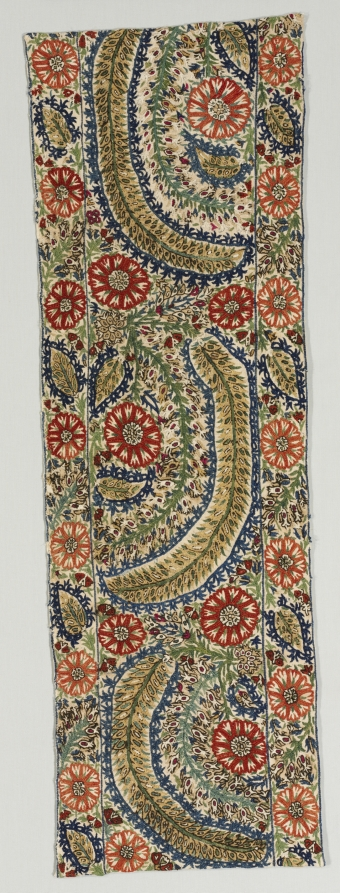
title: Portion of a Bedspread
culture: Greece, Epirus, Yaninna, 18th century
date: 1700s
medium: embroidery: silk on linen tabby ground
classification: Embroidery